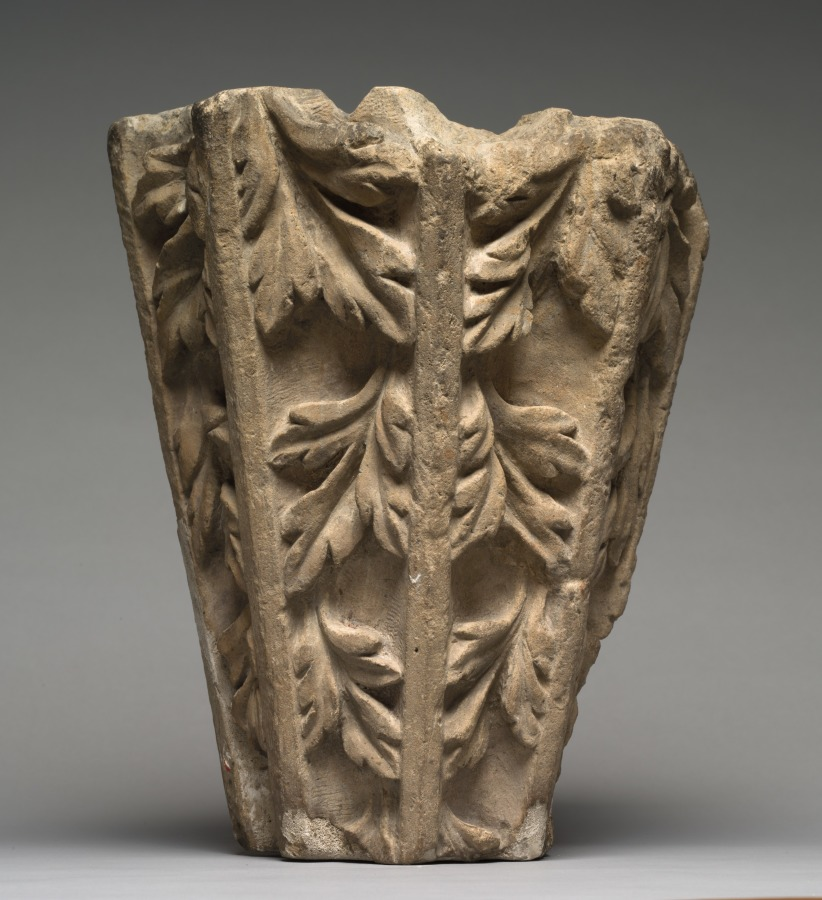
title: Fragment of Gothic Stone Crocket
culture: France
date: 1200s–1300s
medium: stone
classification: Sculpture